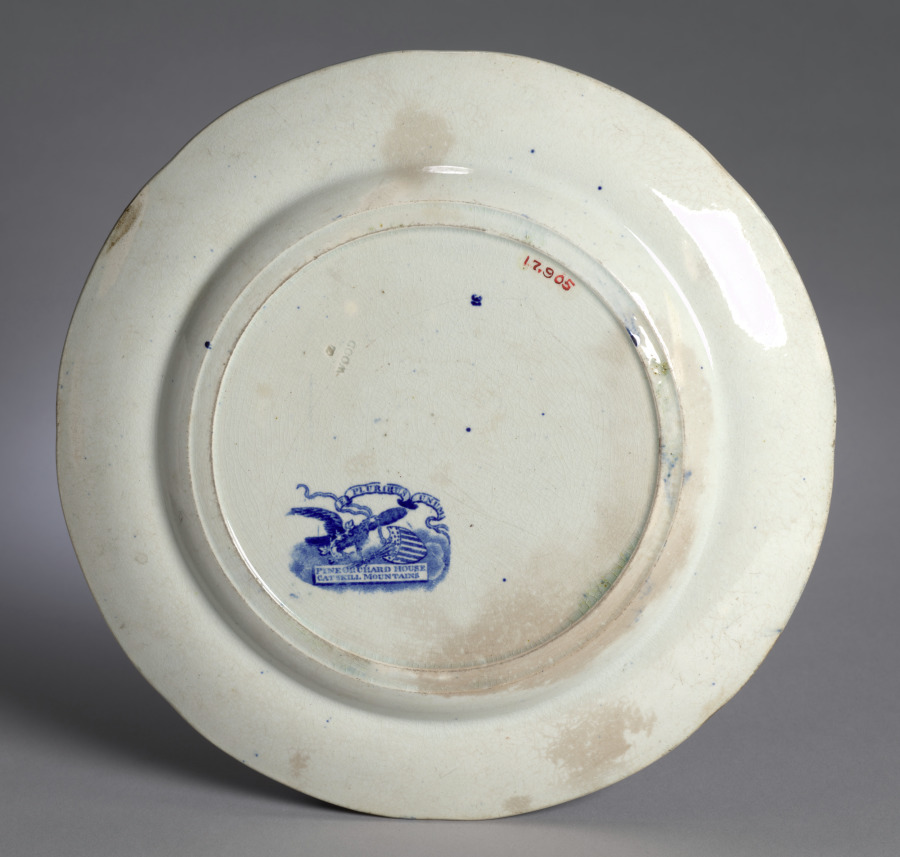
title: Plate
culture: England, Staffordshire, 19th century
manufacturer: Staffordshire Factory (British)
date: c. 1820–1830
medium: ceramic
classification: Ceramic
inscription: "Pine Orchard House, Catskill Mts." with American Eagle and "E Pluribus Unum" in scroll in blue transfer.